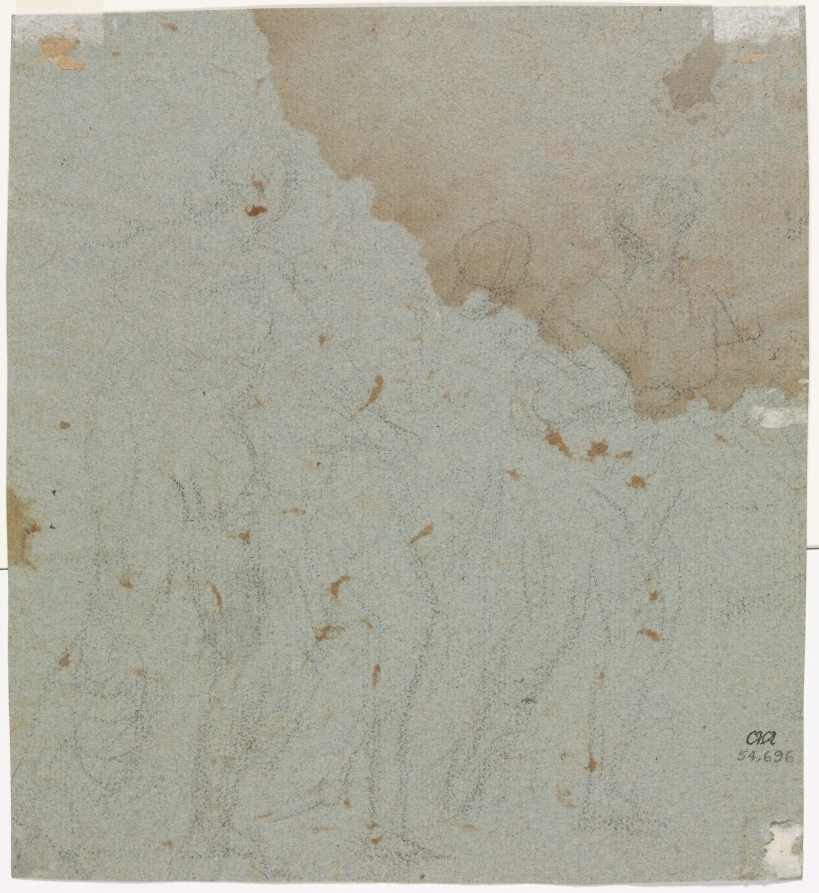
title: Sketch for Lot and His Daughters (verso)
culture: Italy, 17th century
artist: circle of Pietro da Cortona (Italian, 1596–1669)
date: 1600s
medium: black chalk(?)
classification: Drawing